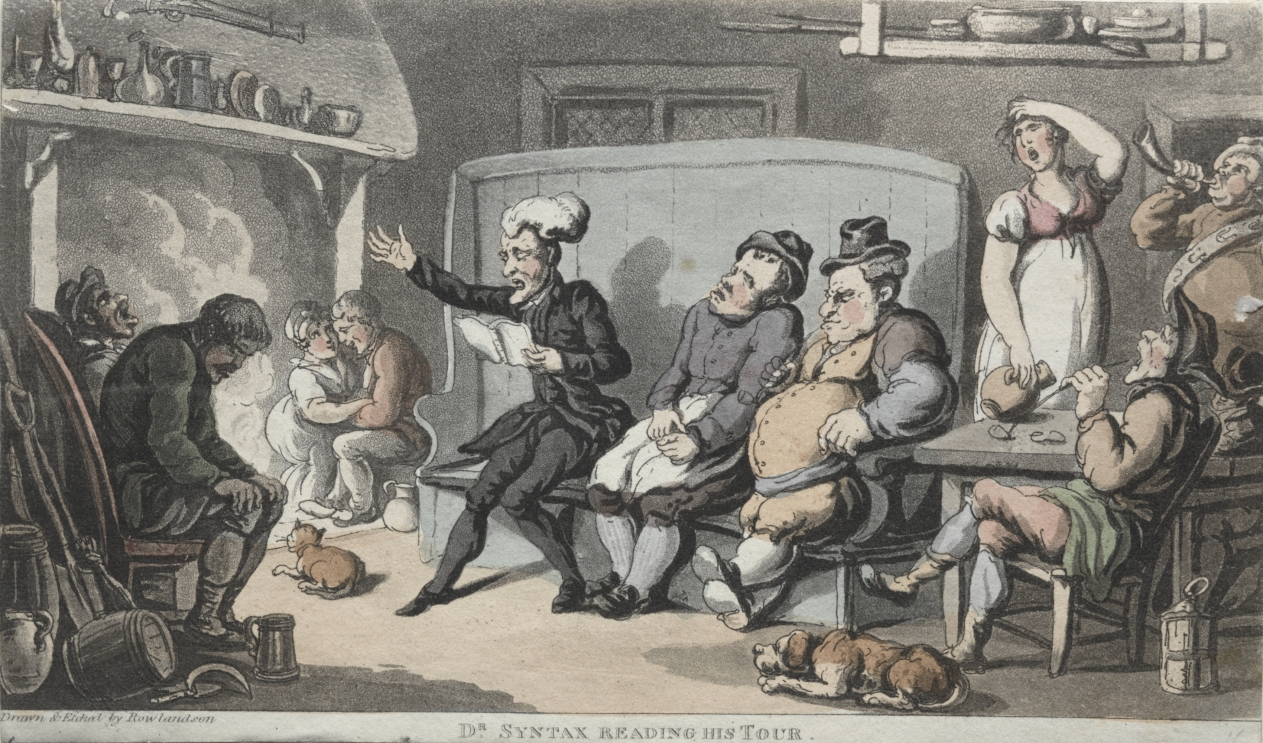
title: The Rev. Dr. Syntax Reading his Tour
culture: England, late 18th-early 19th century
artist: Thomas Rowlandson (British, 1756–1827)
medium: etching, hand colored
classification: Print